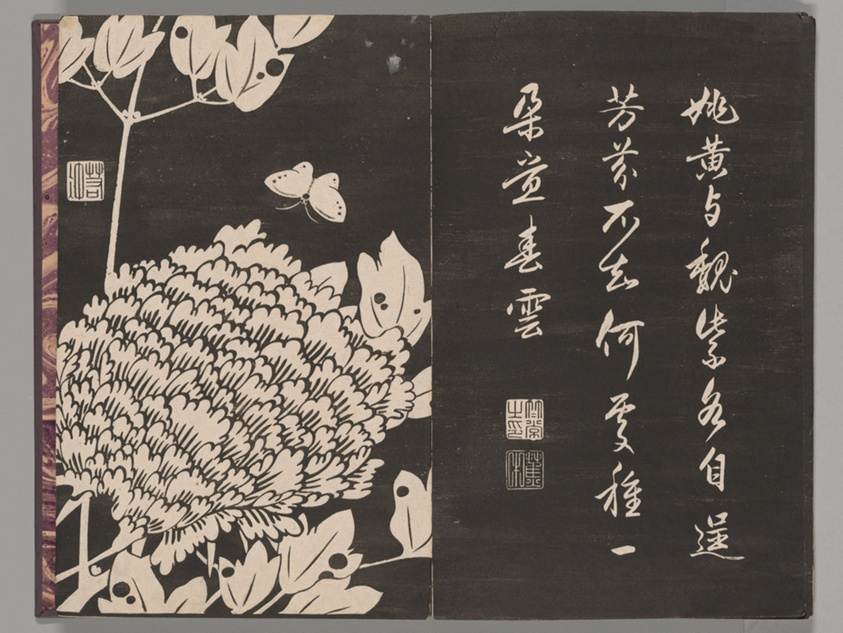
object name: Book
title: Soken sekisatsu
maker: Ito Jakuchu (Japanese, 1716-1800)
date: 1767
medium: Woodblock printed book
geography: Japan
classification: book